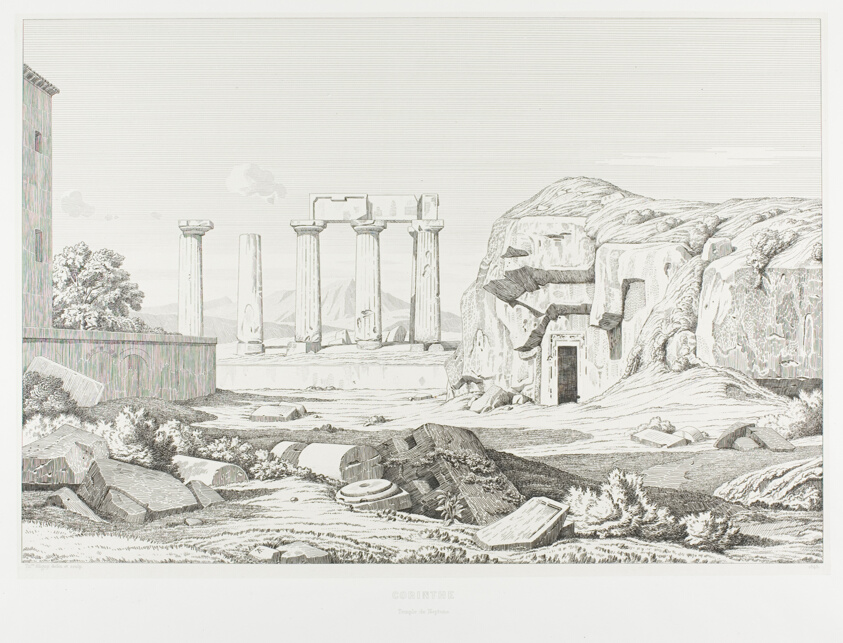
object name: Print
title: Corinth: Temple of Neptune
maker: Théodore Caruelle d'Aligny; French, 1798-1871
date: 1845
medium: Etching on ivory China paper, laid down on white wove paper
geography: France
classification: etching; print; prints and drawing